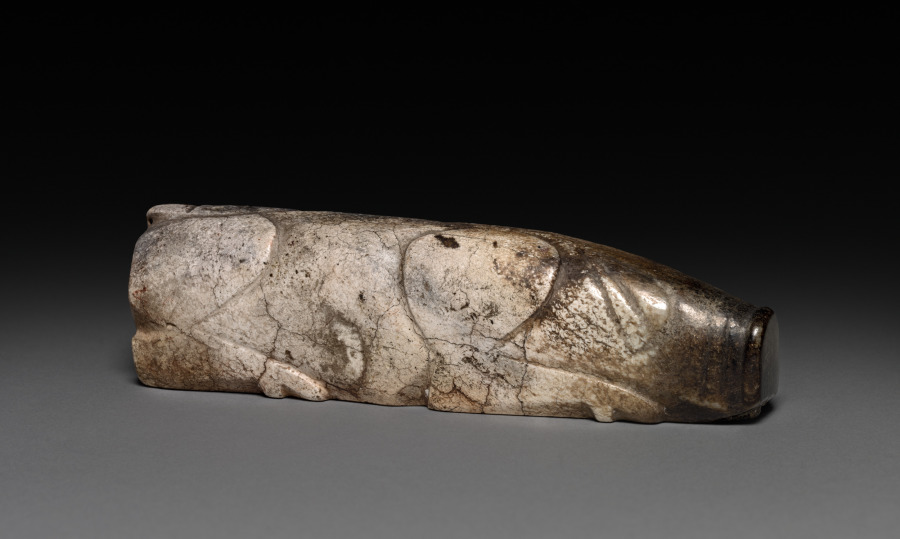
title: Pig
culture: China, Zhou dynasty (c. 1046–256 BCE)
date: 1045–256 BCE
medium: jade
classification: Jade